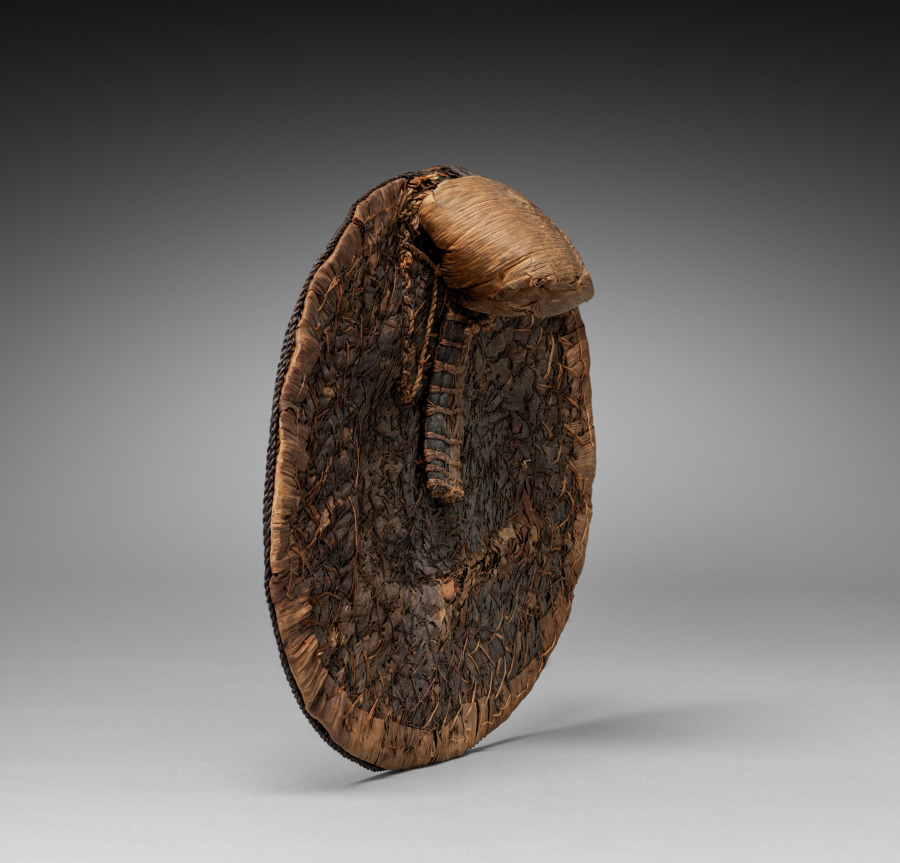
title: Back Skirt/Sitting Pad (negbe)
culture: Africa, Central Africa, Democratic Republic of Congo, Mangbetu-style makers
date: by 1928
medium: Plant fibers and dye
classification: Garment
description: Egbe (singular: negbe) were fashionable and practical garments aristocratic Mangbetu women made for special occasions. Worn over a skirt, it tied onto a girdle along with a frontal “apron.” The curved interior piece rested on the lower back. Thickly woven, flexible natural fibers bent with the body, cushioning the wearer’s behind when sitting. When the woman was standing, the decorated flat portion faced outward, showing off bold geometric motifs. Egbe were among items sold to foreigners at the Mangbetu king’s encouragement as the Mangbetu actively constructed their self image for outsiders during the 1920s and 1930s.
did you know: A contemporary fashion in 1929, when it was purchased or collected, this egbe is now a historical document of past styles.